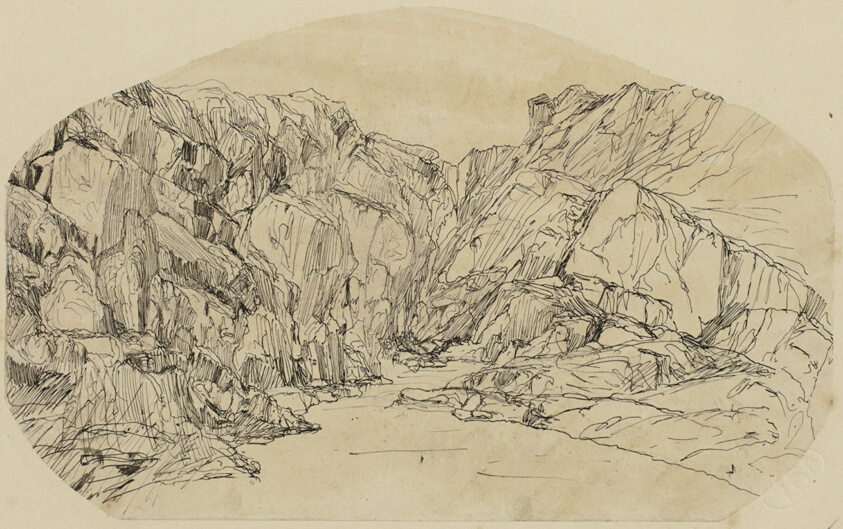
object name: Drawing and Watercolor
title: Steam in a Gorge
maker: Rodolphe Bresdin (French, 1825-1885)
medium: Pen and black ink, on buff tracing paper, laid down on buff wove paper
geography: France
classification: pen and ink drawings; drawings (visual works); prints and drawing